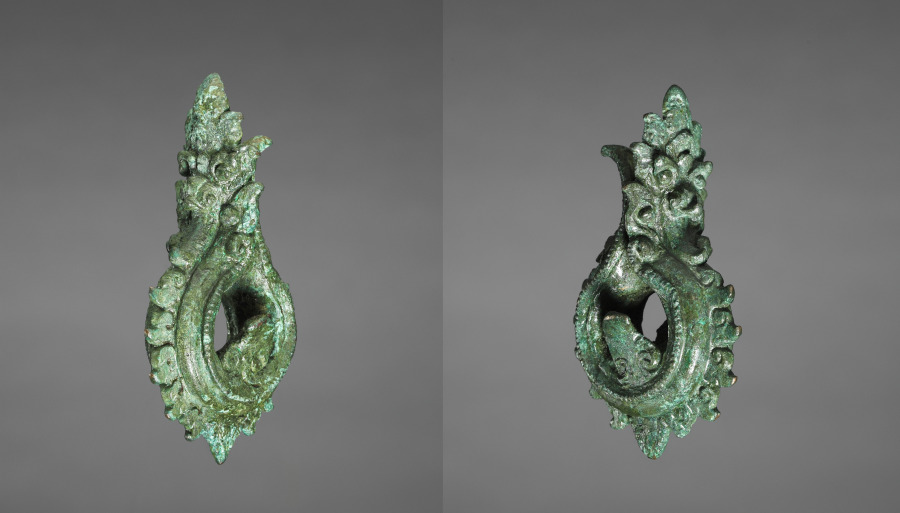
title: Earring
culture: Cambodia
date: 1200s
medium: bronze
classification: Jewelry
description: This pair of earrings is in the form of naga, or water serpent, one of the most popular decorative motifs in Cambodian art. While bronze objects such as furniture and palanquin fittings and finials, hooks, rings, etc., were among the most typical items of the classical Angkorean art (12th–13th century), jewelry is very rare. Originally they must have been gilt. It is conceivable that the present pair may not have been used as a regular ear ornament but enhanced a Khmer sculpture, a common practice, which would explain their heavy weight and large size.